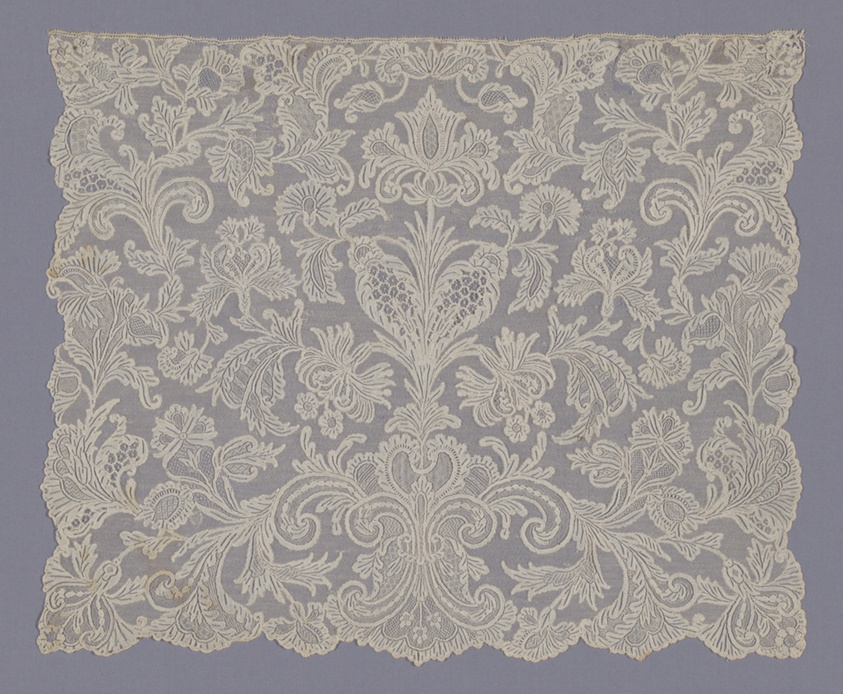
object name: Costume and Accessories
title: Cravat End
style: 18th Century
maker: Flanders, Brussels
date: 1730-50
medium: Linen, needle lace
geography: Flanders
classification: textile; lace - needle; lace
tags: tulips, floral motifs, flowers, foliage, pineapples